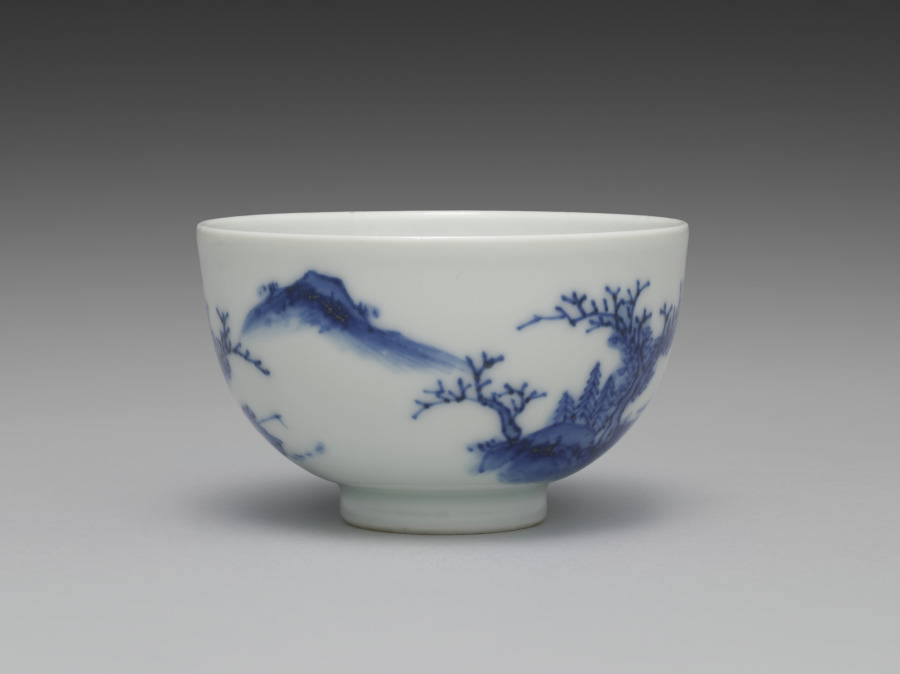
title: Teacup from Tea Set with Chinese Landscape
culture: Japan, Meiji period (1868–1912)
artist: Seifū Yohei III (Japanese, 1851–1914)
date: 1893–1914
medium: Porcelain with underglaze blue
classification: Ceramic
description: The theme of this sencha tea set is the Chinese scholar-recluse in an idyllic landscape. Each of the five teacups has a landscape with an architectural structure and some human activity. This tea set has a side-handled pot called a kyūsu, used for steeping, straining, and serving tea. Unlike some others, this set also has a yuzamashi, a container used to cool boiled water to just the right temperature for the best flavor when steeping. Seifū Yohei III’s painting teacher, Tanomura Chokunyū (1814–1907), made a visual record of famous sencha events that shows how these kinds of porcelains fit with objects such as a stove and kettle to form a complete set of utensils for tea preparation, and with ensembles of decorative objects meant to inspire creativity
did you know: This cup has a man walking toward a group of three pavilions announced with a banner hanging from a tall post; beyond this are two large deciduous trees sheltering a stand of small conifers. Across the water from this site is another man sitting on the bank fishing with a large woven basket for his catch beside him.